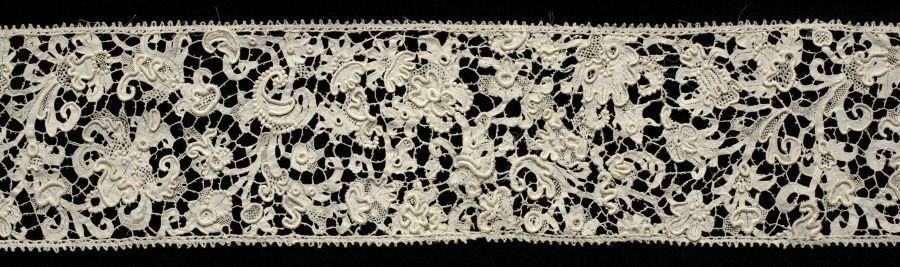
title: Lace Lappet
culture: Italy, Venice, 1700s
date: 1700s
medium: Linen: needle lace (Venetian Raised Point)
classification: Lace